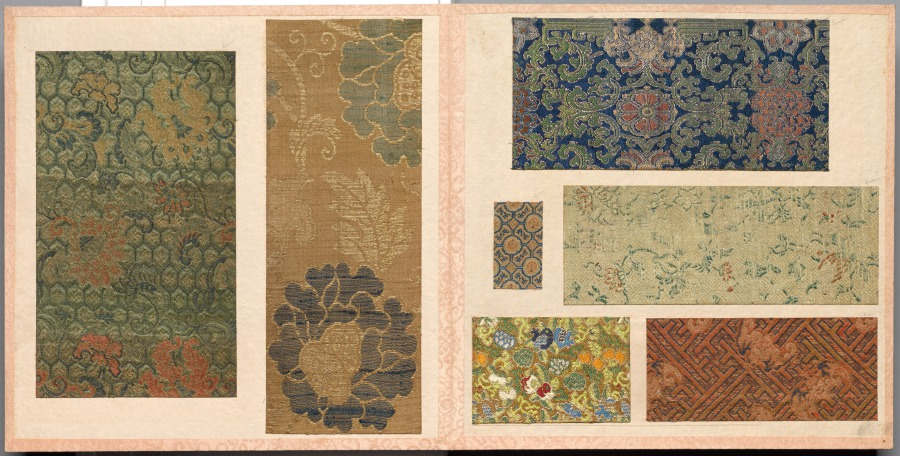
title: Album of Textile Samples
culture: Japan and China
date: 1700s–1800s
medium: silk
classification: Textile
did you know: This album contains 46 pages with 156 mounted Chinese or Japanese textile samples.